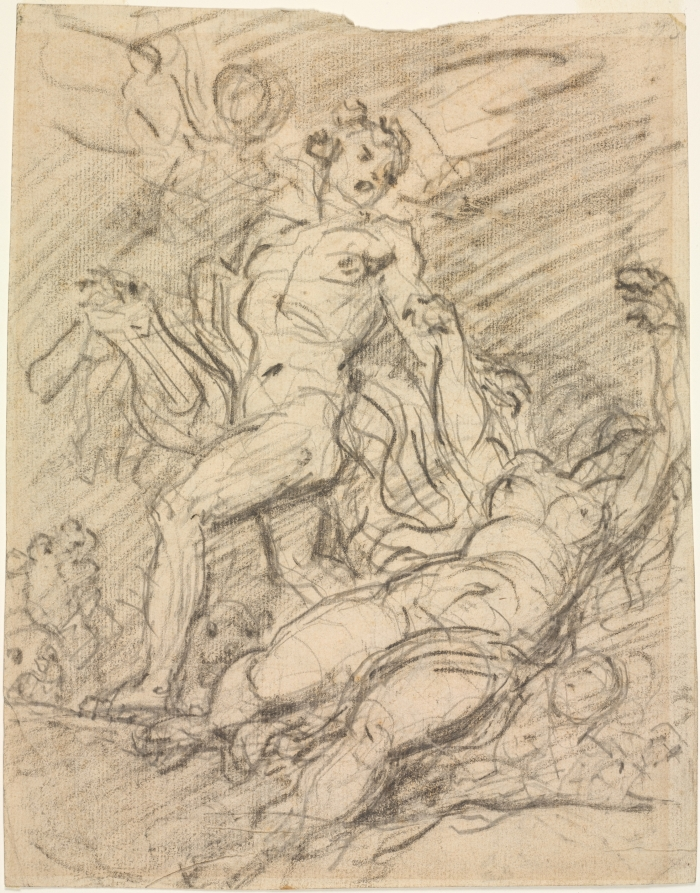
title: Orpheus and Eurydice (recto)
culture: France, 18th century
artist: Jean-Honoré Fragonard (French, 1732–1806)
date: c. 1761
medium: black chalk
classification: Drawing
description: Quick drawings could serve a variety of purposes, and it is not always clear today why an artist created a particular sketch. This one may record a painting Fragonard saw during a journey to Italy, or capture an idea he was considering for a painting of his own. Orpheus, identified by the lute, grasps for his love Eurydice as she is pulled down into Hades. The snarling animals near his feet may represent Cerberus, the multiheaded guard dog of the underworld.